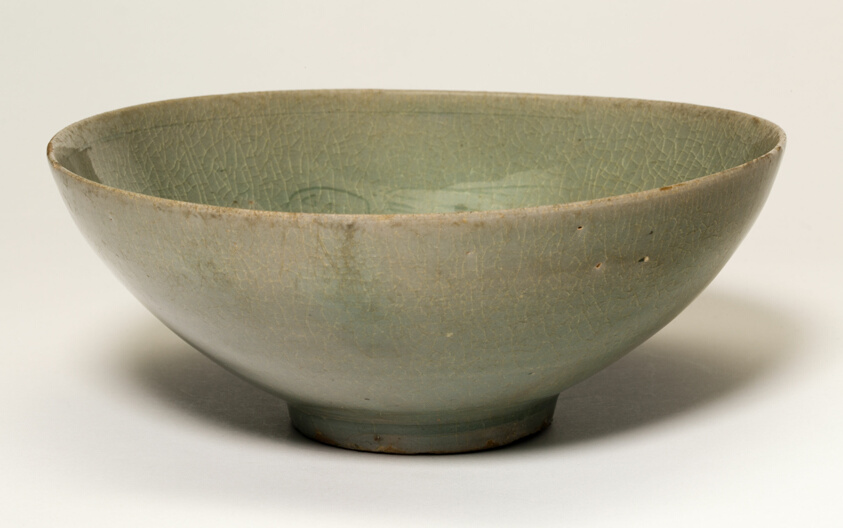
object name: Vessel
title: Bowl with Parrot Motif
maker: Korea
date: Goryeo dynasty (918–1392), early 12th century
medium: Stoneware with celadon glaze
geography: Korea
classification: stoneware; asian art; ceramics